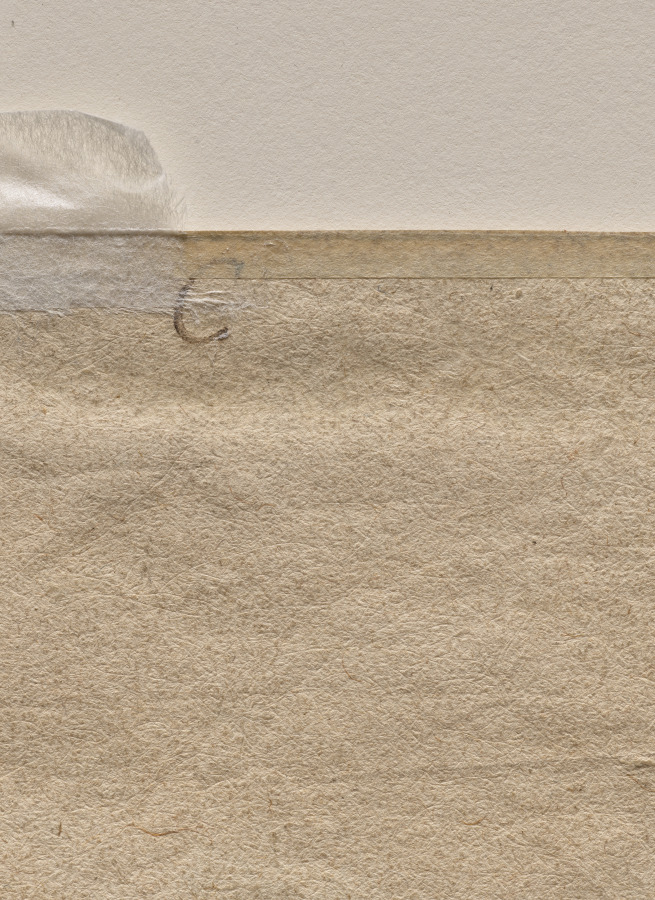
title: A Faun Grasping a Bunch of Grapes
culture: Flanders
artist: studio of Peter Paul Rubens (Flemish, 1577–1640)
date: after 1616–18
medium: black chalk and brush and brown wash; framing lines in pen and black ink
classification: Drawing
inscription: VERSO, upper right, in brown ink: no 40 ; lower left, in brown ink: 6/14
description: This drawing relates to a finished painting (now lost) by Peter Paul Rubens that depicted a faun (a woodland creature similar to a satyr) squeezing grapes into the mouth of a young Bacchus. That figure, shown here, could be Silenus, who educated Bacchus on the pleasures of wine, revelry, and nature. Rubens ran a large studio and employed numerous apprentices, one of whom may have made this copy after the original painting. As a form of instruction, Rubens added ink wash to the drawing to enhance the shading on the figure and shadows behind it.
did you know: Swirling draperies like the one haphazardly worn by this faun do more than conceal, in many cases they reveal an artist's technical skill. To render folds and gathers in fabric, artists used chiaroscuro, meaning contrasting light and dark tones.